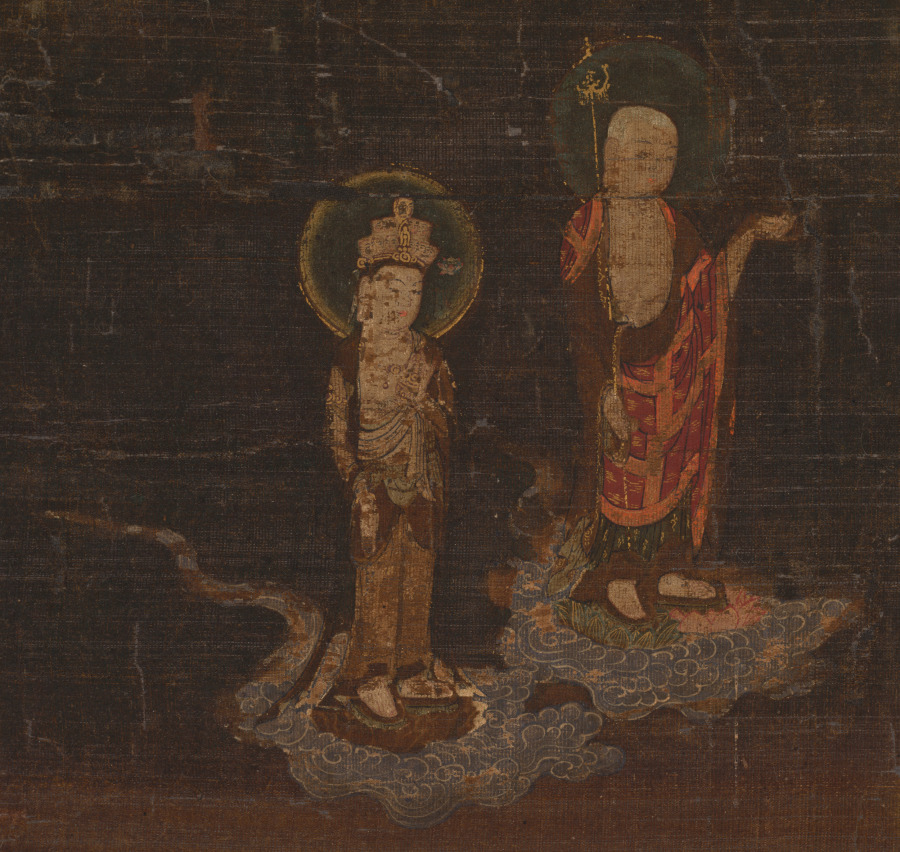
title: Kasuga Shrine Mandala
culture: Japan, Kamakura period (1185–1333)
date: early 1300s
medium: Hanging scroll; ink, color, and gold on silk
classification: Painting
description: A golden path beginning at the bottom of this painting leads up to four red-and-white buildings to the left, then to a fifth building on the right. These are the five shrine halls of Kasuga Taisha in Nara. Above and beyond the buildings is a sacred mountain range––with Mount Mikasa at center, Mount Wakakusa in gold to the left, and the sun or moon rising up behind the mountains. Sacred deer appear here and there. Five figures representing the original Buddhist forms of the five kami of the shrine complex stand on clouds above the mountains.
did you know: Sacred deer, the vehicles of the Kasuga deities, move about the shrine compound.